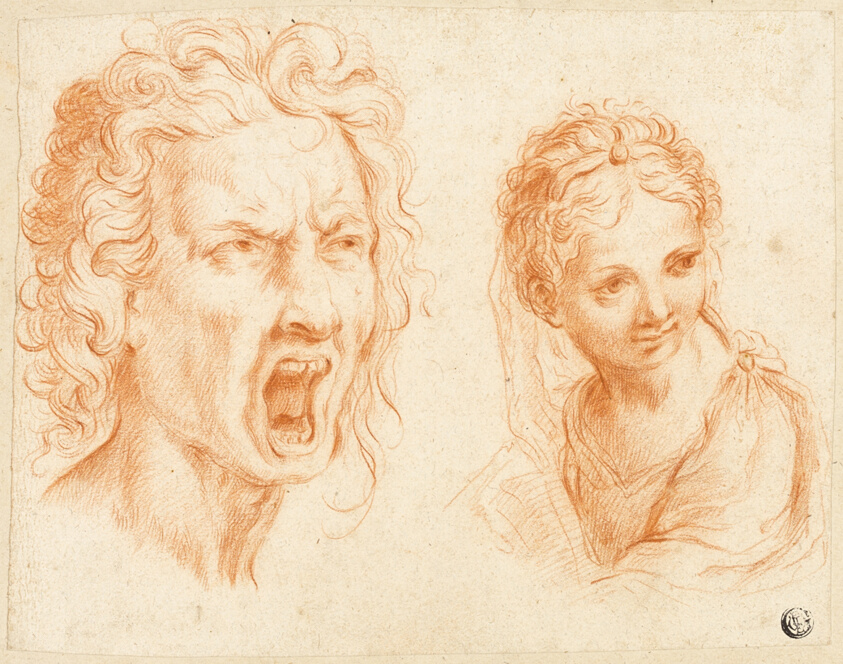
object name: Drawing and Watercolor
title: Grimacing Male Head, Bust of Girl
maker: Unknown Artist; Italian, 15th/16th century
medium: Red chalk on cream laid paper, laid down on cream laid card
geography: Italy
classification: chalk; paper; drawings (visual works); prints and drawing